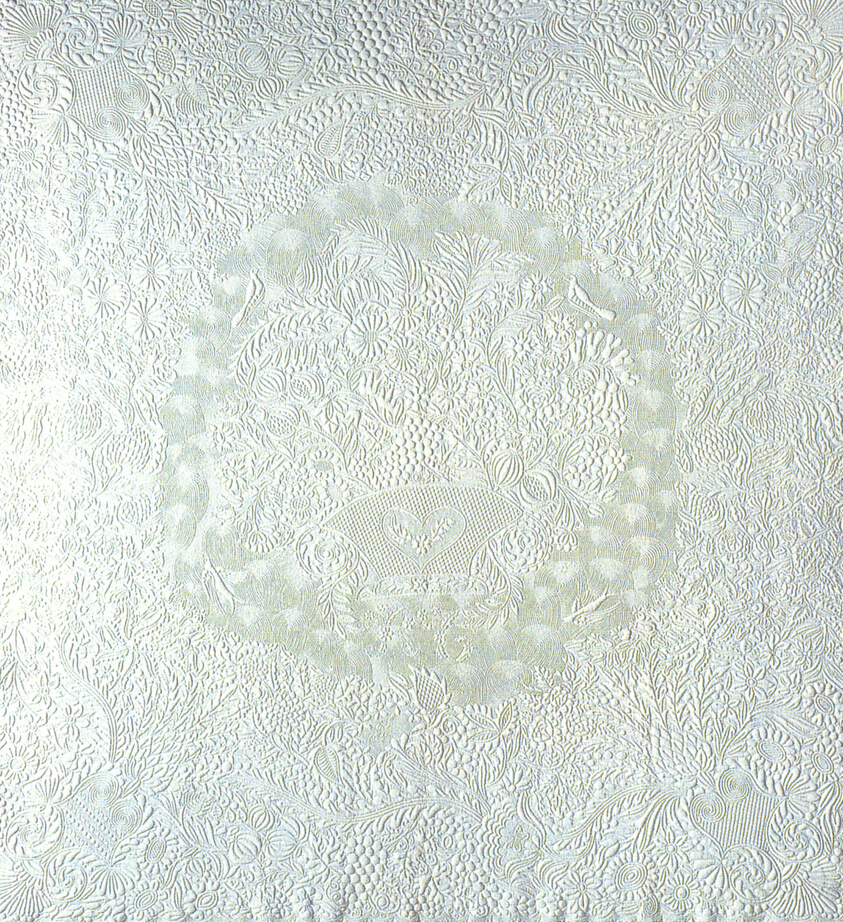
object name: Textile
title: Bedcover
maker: France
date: 1825/50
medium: Cotton, plain weave; backed with cotton, plain weave; quilted with cotton in raised areas (trapunto)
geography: France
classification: textile; needlework - quilt